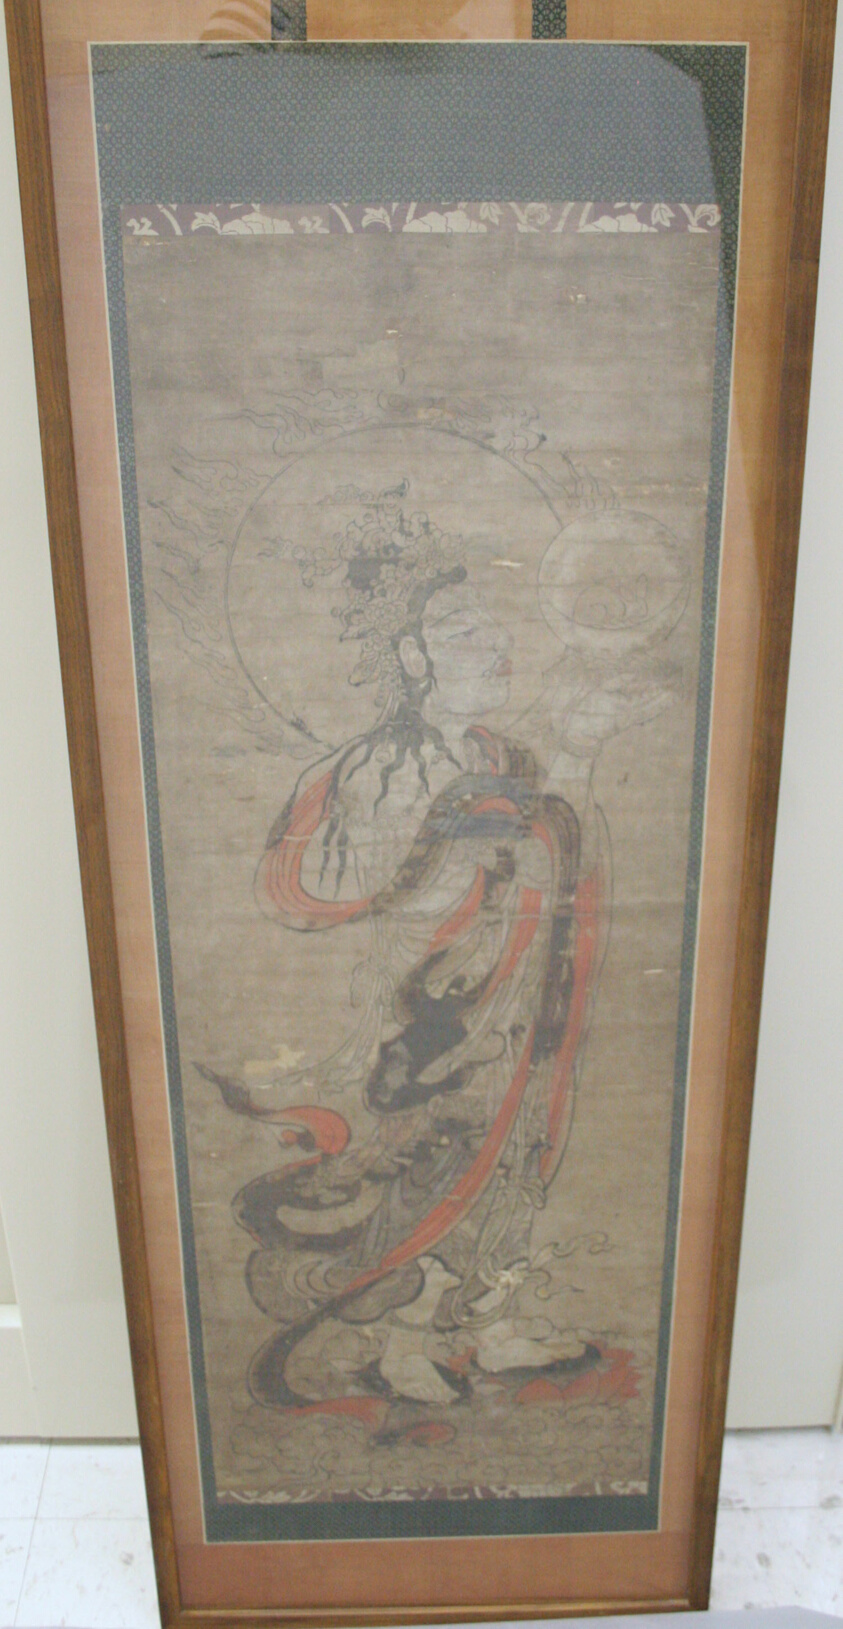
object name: Print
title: Gatten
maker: Artist Unknown; Japanese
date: 1407, Muromachi Period 1333–1573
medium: Hand-colored woodblock print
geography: Japan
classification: woodblock print; print; asian art